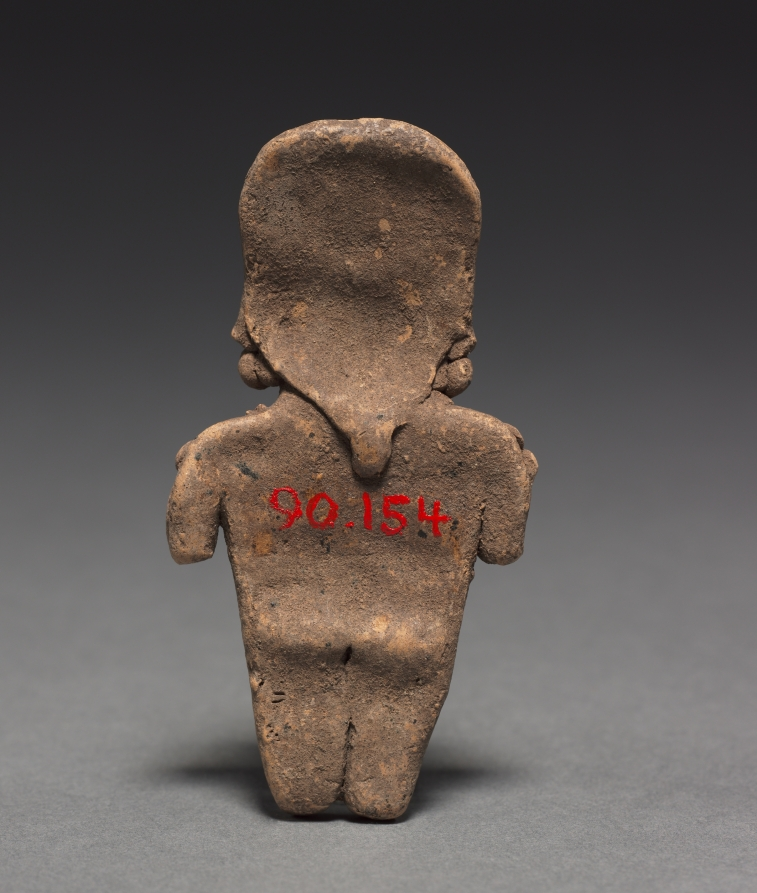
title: Female Figurine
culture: Mesoamerica, Mexico, Guanajuato, Chupícuaro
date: 400–100 BCE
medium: pottery with traces of white and red pigment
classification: Sculpture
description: The Chupícuaro culture, located north of Mexico City in the state of Guanajuato, created a distinctive ceramic tradition including small clay figurines. This example is said to belong to a group of ten figurines from the same burial or cache (1990.145–154). The group includes both males and females that can be sorted into couples based on size.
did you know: Groups of figurines were sometimes arranged in scenes and likely used in household rituals.